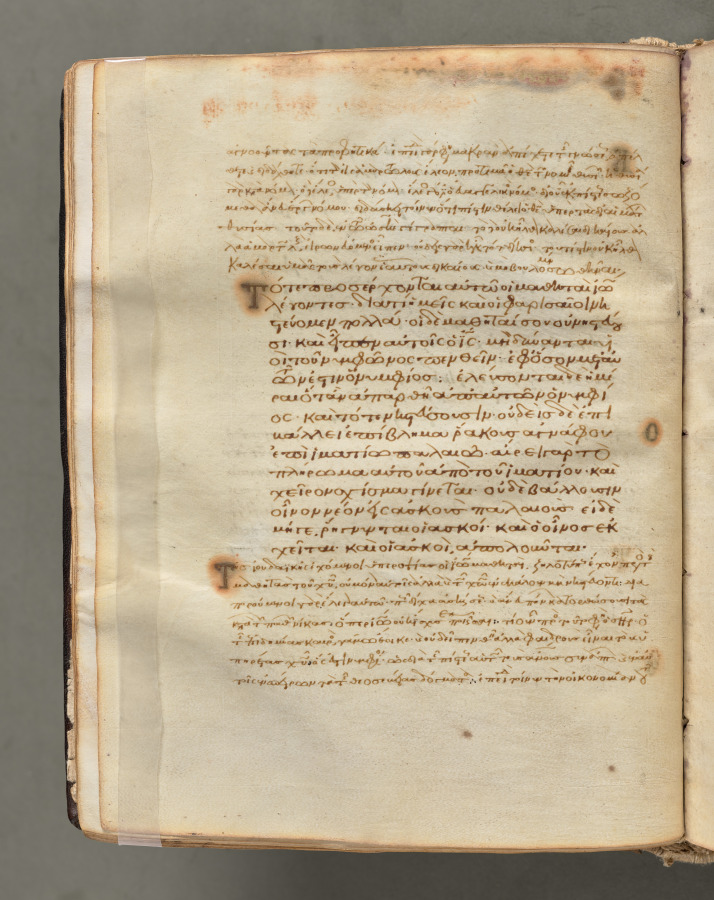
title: Text, folio 38 (verso), from a Gospel Book with Commentaries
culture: Byzantium, Constantinople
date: c. 1000–1100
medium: ink, tempera, and gold on vellum; leather binding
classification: Bound Volume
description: Each of the four gospels in this book opens on a page with brilliantly illuminated borders depicting the author of the text as well as birds-principally peacocks, symbols of the immortality of the soul-and fountains, representing the fountain of life and the salvation of the soul. This volume consists of 428 leaves with texts in Greek. Its level of sophistication suggests that it was probably written and decorated in a monastery in Constantinople.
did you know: Gospel Books were carried in procession through Byzantine churches.